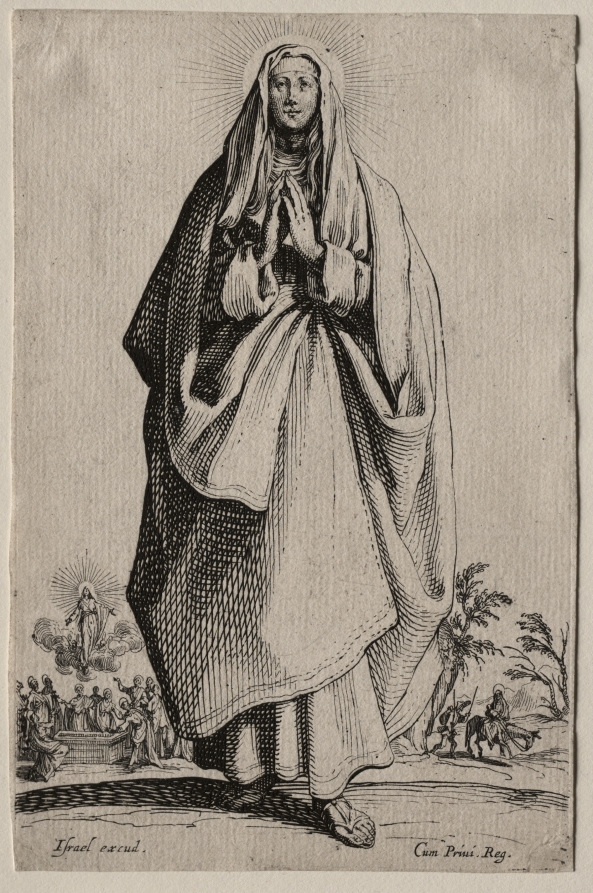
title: Salvatoris Beatae Mariae Virginis Sanctorum Apostolorum Icones/Les Grands Apôtres (The Large Apostles): La Sainte Vierge (The Holy Virgin)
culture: France, 17th century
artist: Jacques Callot (French, 1592–1635)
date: 1631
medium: etching and engraving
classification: Print